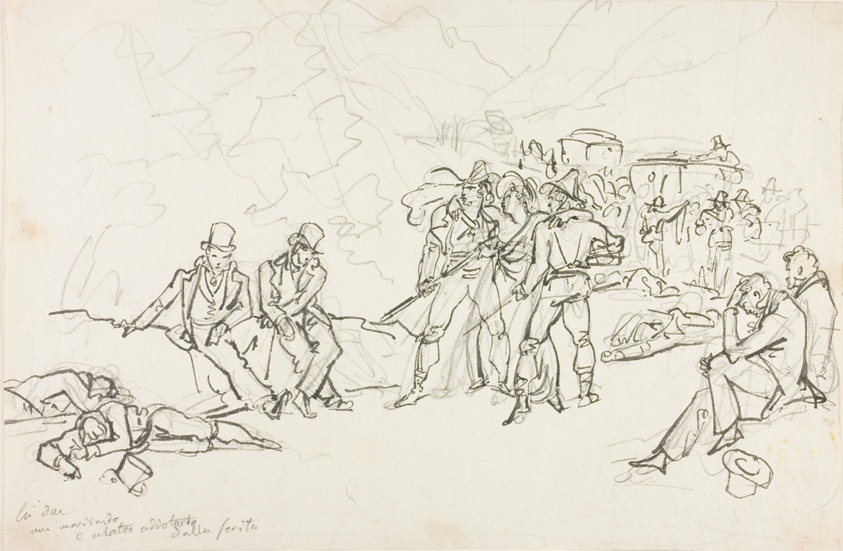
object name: Drawing and Watercolor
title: The Stagecoach Holdup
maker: Bartolomeo Pinelli (Italian, 1781-1835)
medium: Pen and black ink and graphite on ivory laid paper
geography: Italy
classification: pen and ink drawings; drawings (visual works); prints and drawing